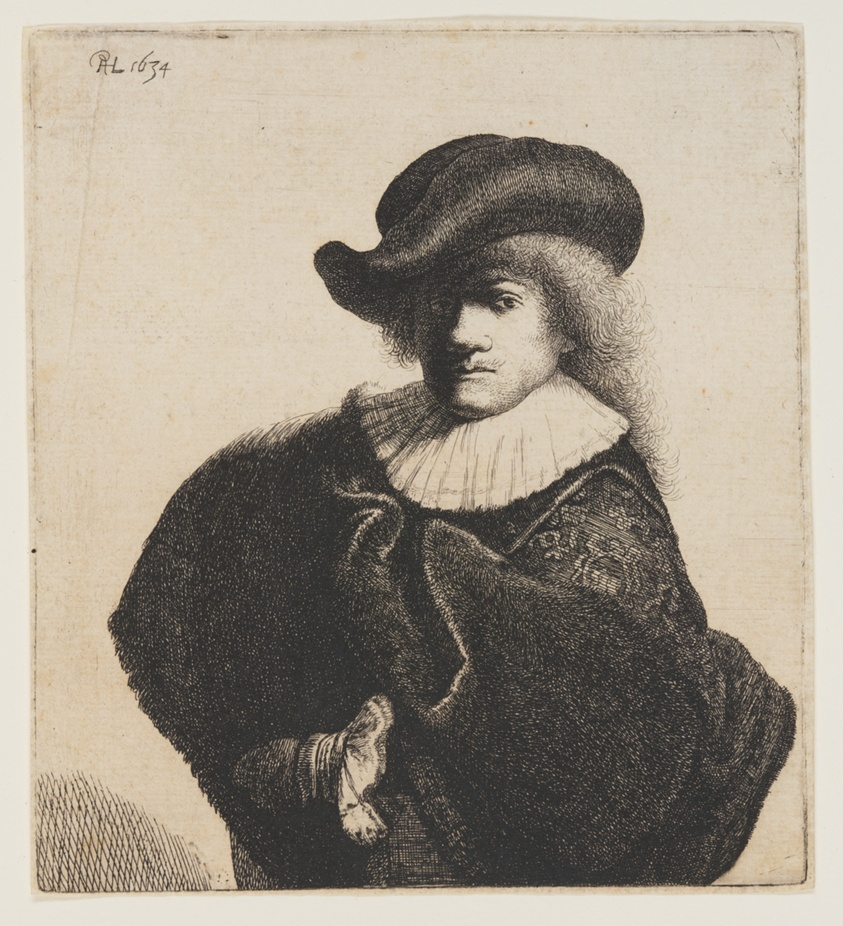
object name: Print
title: Portrait of Rembrandt Wearing a Soft Hat and Embroidered Coat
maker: Jan van Vliet (Dutch, c. 1610–1635); after Rembrandt van Rijn (Dutch, 1606-1669)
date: 1634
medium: Etching on ivory laid paper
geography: Netherlands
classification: print; paper; prints and drawing; etching